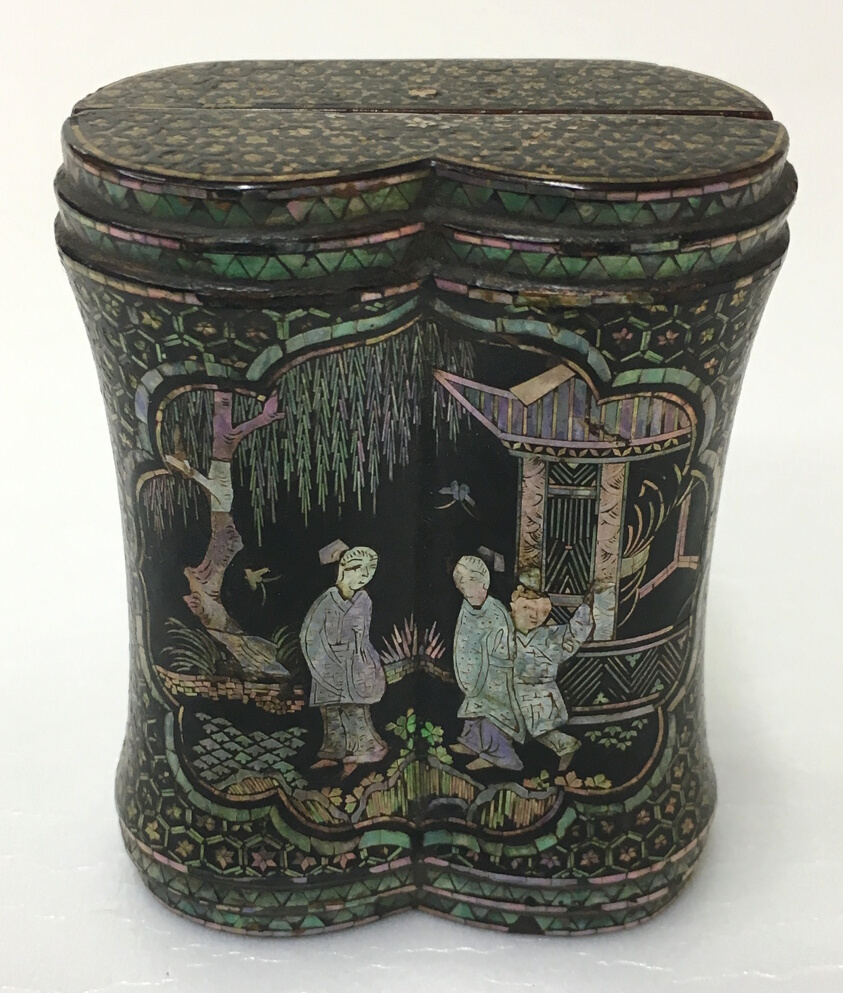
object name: Vessel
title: Lacquer Box with Mother-of-Pearl Inlay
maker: China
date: Qing dynasty (1644-1911)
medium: lacquer box in shape of double stalk of bamboo, cover with nacre, inlay foliated panel of 3 scholars in garden, surrounding inlaid border composed of six-pointed stars in diamond outline pattern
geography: China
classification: lacquer; lacquerware; asian art